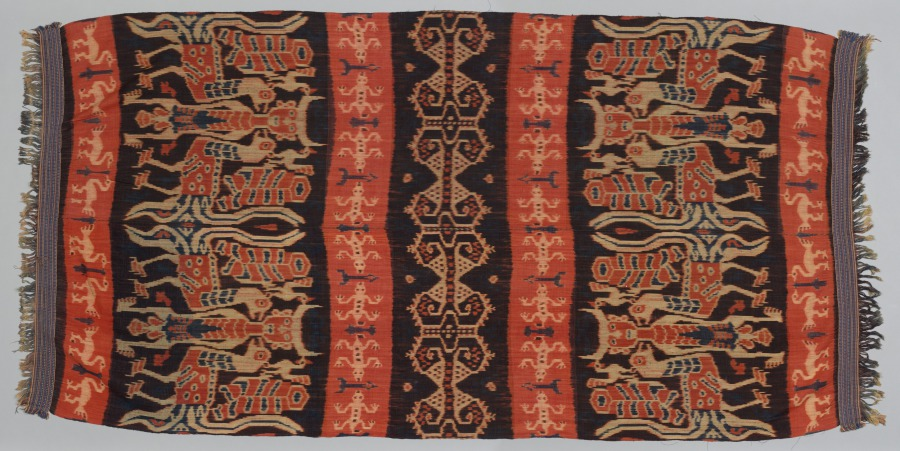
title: Hinggi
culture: Indonesia, Sumba, early 20th century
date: early 1900s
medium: cotton, ikat dyed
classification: Textile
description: On the Indonesian island of Sumba, hinggi were one of two types of textiles that were worn for ritual ceremonies and used as exchange gifts required on occasions of birth, marriage, or death. Traditionally, their designs reflect the religious and social structure of Sumbanese culture. The abstract motif in the center of this mantle represents an open shellfish, symbolic of royal power. The crocodile, seen here in the red bands to either side of the central band, is also associated with royal power as well as with Sumbanese mythology of the afterlife. The larger, standing male figures wearing horned headdresses are an extremely ancient motif, going back to the Neolithic period.